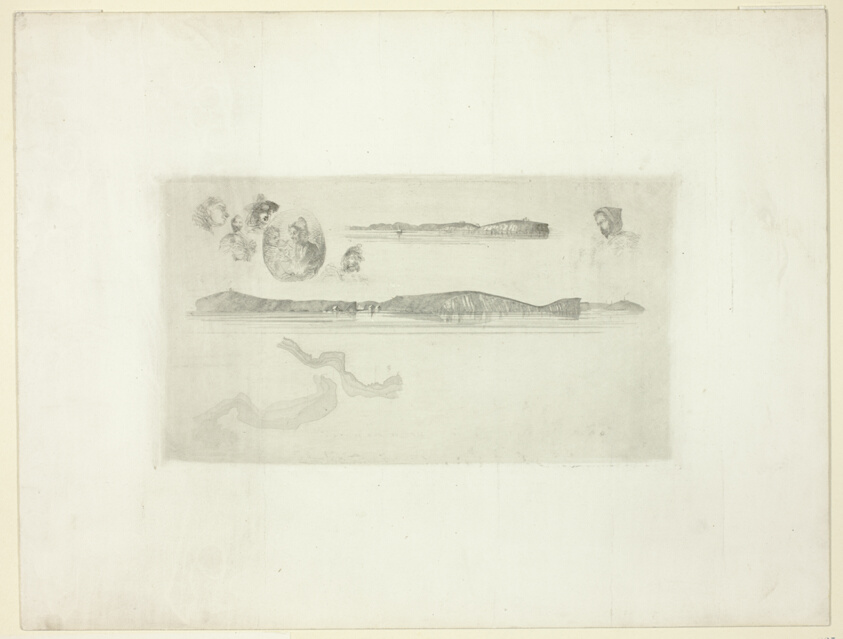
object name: Print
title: Sketches on the Coast Survey Plate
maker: James McNeill Whistler (American, 1834-1903)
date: 1854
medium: Etching in black ink on white wove paper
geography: United States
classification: etching; print; prints and drawing; paper